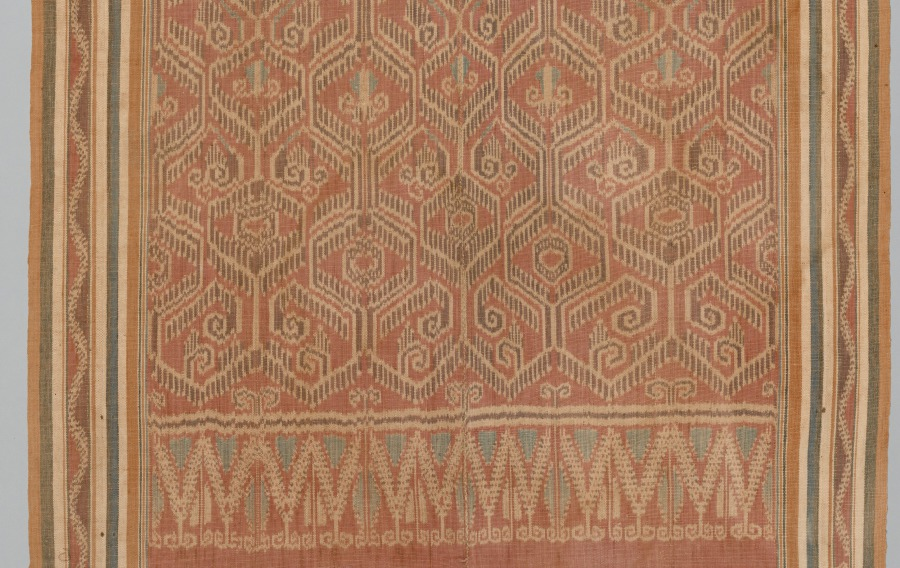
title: Pua (Ceremonial Blanket or Hanging)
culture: Borneo, Kalimantan, Iban Tribe, 20th century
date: 1900–1970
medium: tabby weave, warp ikat; cotton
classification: Textile